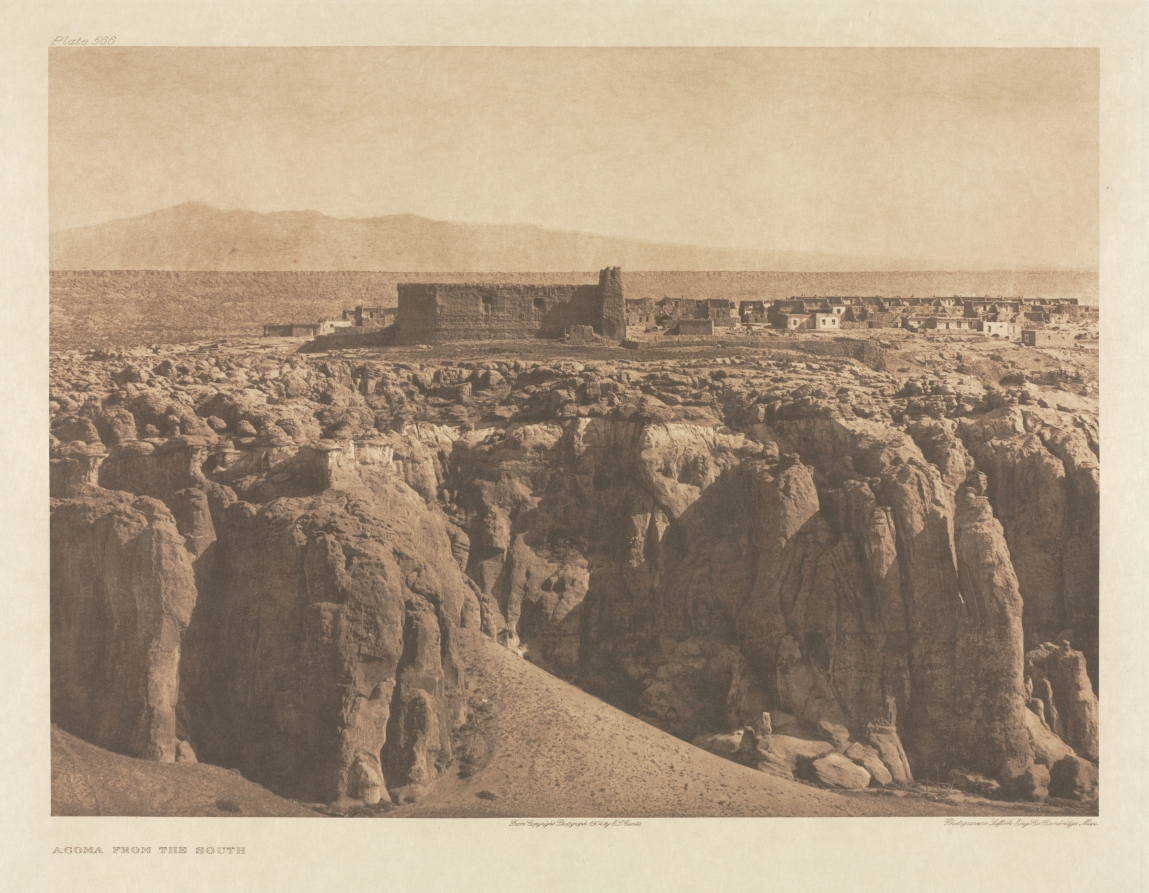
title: Portfolio XVI, Plate 566: Acoma from the South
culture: America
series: The North American Indian: being a series of Portfolios picturing and describing the Indians of the United States, the Dominion of Canada, and Alaska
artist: Edward S. Curtis (American, 1868–1952)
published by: The University Press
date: 1904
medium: photogravure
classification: Portfolio